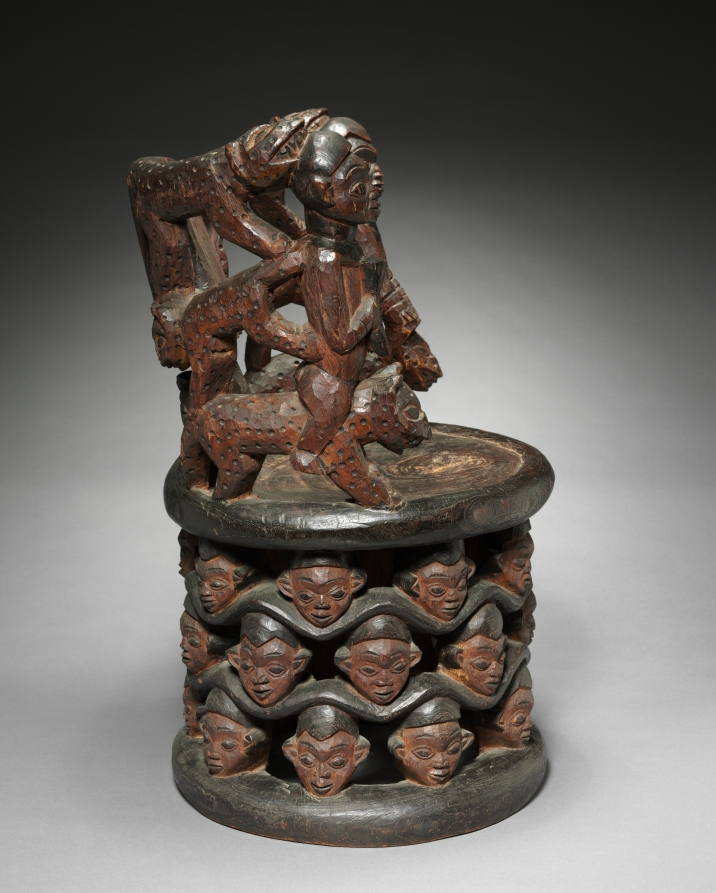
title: Prestige Chair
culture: Africa, Central Africa, Cameroon, Babanki-style maker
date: 1800s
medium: Wood and paint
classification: Furniture and woodwork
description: This stately chair attributed to the Babanki peoples of the Cameroon Grassfields features an unusual configuration of male and female figures. They are mounted on stylized leopards, animals revered as embodiments of power and royalty, which stand atop a base of three undulating rings bearing 24 heads. Chairs like this one serve as visual records that help mark kingships through the ages, conveying power and authority. The chair type was relatively common at the time; they were carved for sale to Europeans and local patrons, and also used as articles of royal gift exchange.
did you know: A British soldier acquired this work in Cameroon during the First World War.